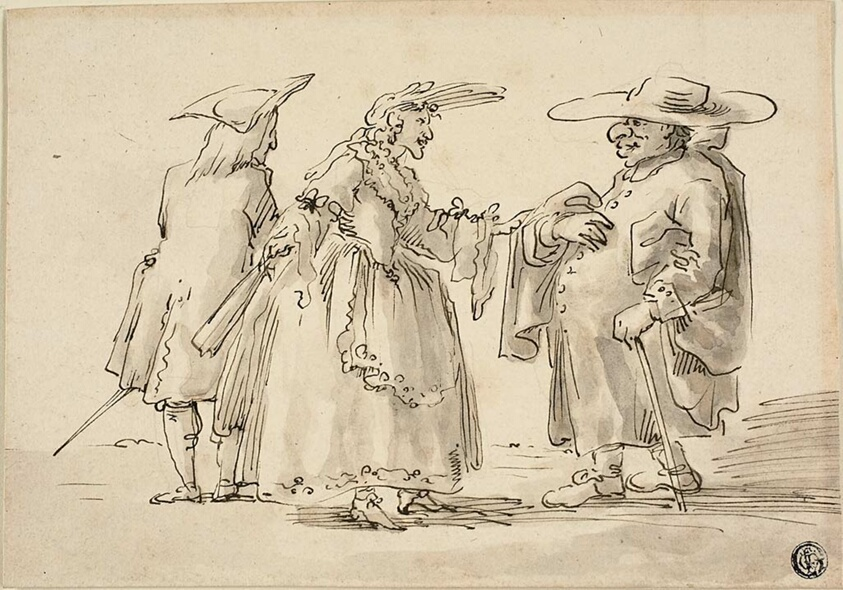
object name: Drawing and Watercolor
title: Caricatures of Two Men and a Woman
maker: Marco Ricci (Italian, 1676-1729); or Bernardo Bellotto (Italian, 1721-1780); or Pier Leone Ghezzi (Italian, 1674-1755)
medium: Pen and brown ink, with brush and brown and gray wash, over traces of graphite, on ivory laid paper, laid down on ivory laid paper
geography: Italy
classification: pen and ink drawings; drawings (visual works); prints and drawing